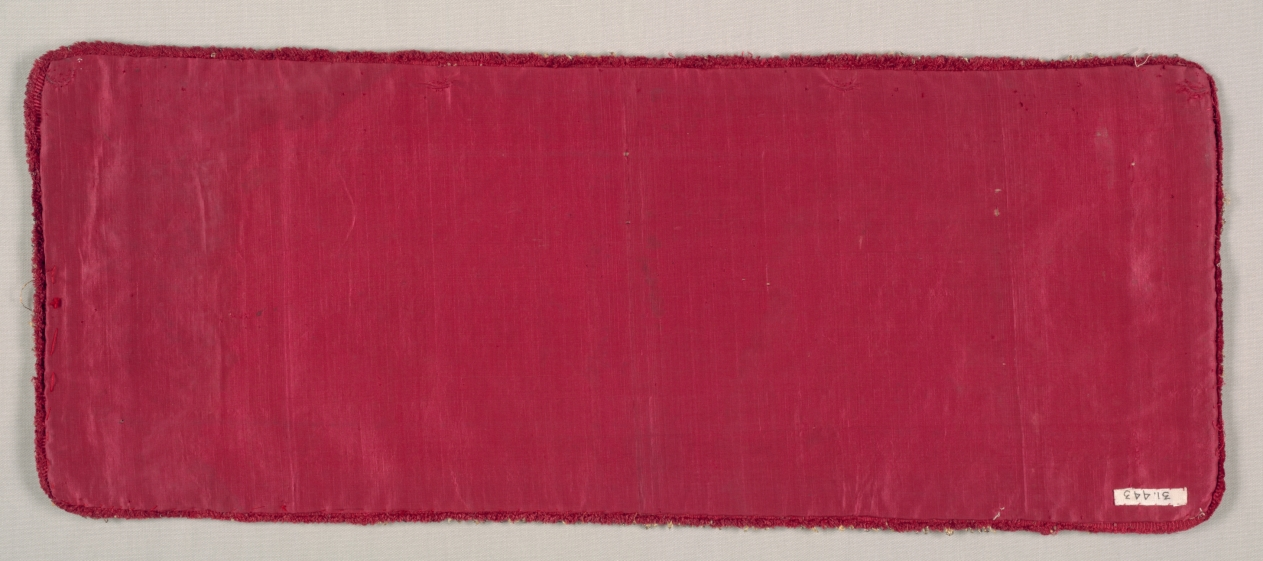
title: Apparel from a Dalmatic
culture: Italy, first half of the 16th century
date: 1500–1550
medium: Plain-weave linen with silk and metal thread embroidery; or nué (shaded gold)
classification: Embroidery